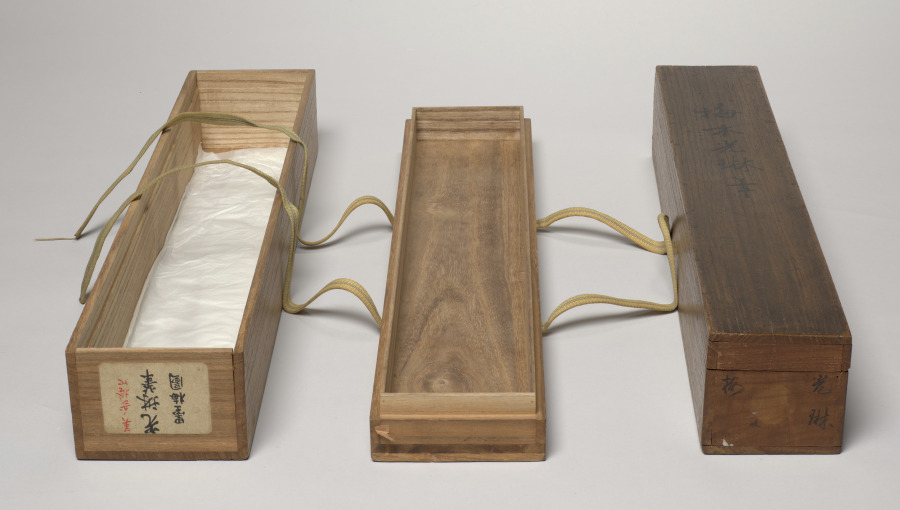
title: Plum Tree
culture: Japan, Edo period (1615–1868)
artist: Ogata Kōrin (Japanese, 1658–1716)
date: c. 1700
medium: hanging scroll; ink on silk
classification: Painting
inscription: Artist's signature and seal above hillock bottom right corner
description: Ogata Kōrin had to think through his design carefully to create these white plum blossoms and deliver their effect, as he used the reserve technique—where selected areas of the painting surface are left unpainted—to achieve it. He probably roughed in the tree before applying an ink wash to the entire silk surface, except where he intended to place the flowers. He likely then returned to articulate the petals and, in some cases, the pistils and stamens. The composition shows the tree twisting out of view, only to return with a branch of new growth jabbing forth from an old, broken limb, thereby heightening the visual impact of the blossoms.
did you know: The Rinpa style of painting is named for Ogata Kōrin, even though he did not create it.